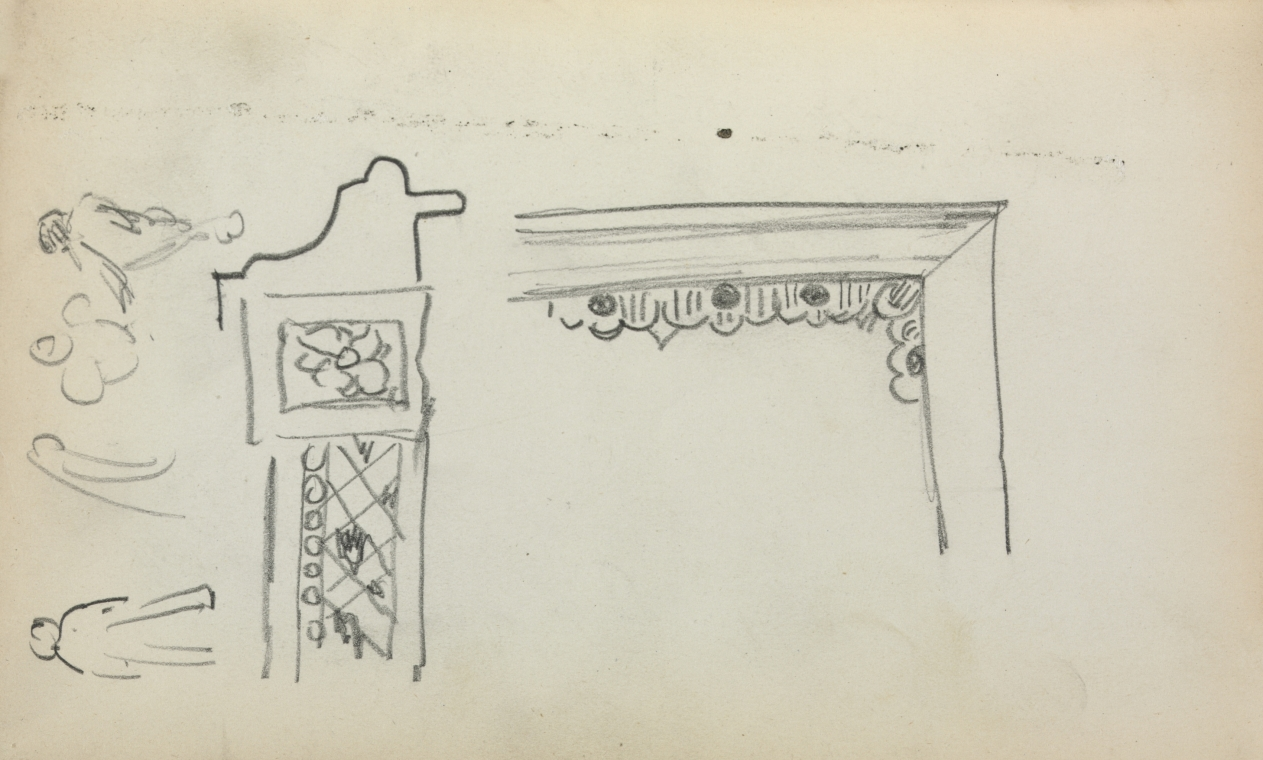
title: Italian Sketchbook: Architectural Details and Figures (page 199)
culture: America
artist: Maurice Prendergast (American, born Newfoundland [now Canada], 1858–1924)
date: 1898–1899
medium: pencil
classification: Bound Volume